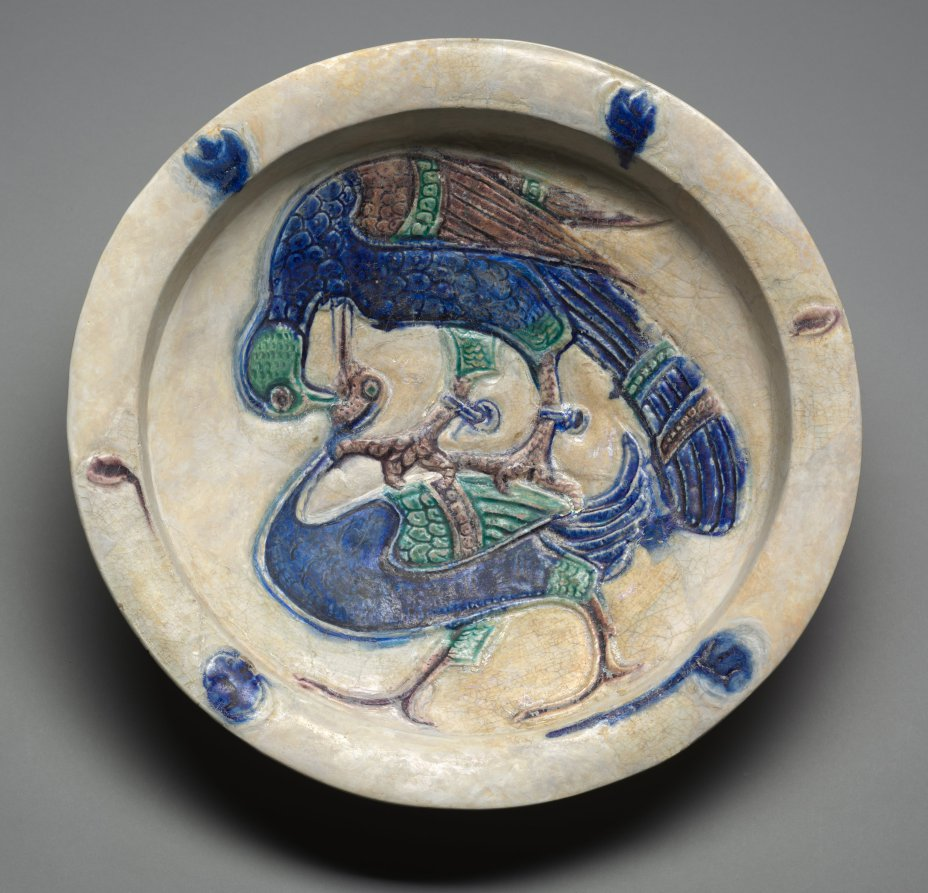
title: Dish with Falcon Attacking a Water Bird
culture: Syria, possibly Tell Minis, Zangid (1127–1251) or Ayyubid period (1171–1260)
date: 1100s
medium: Fritware with carved decoration and underglaze design, Lakabi ware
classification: Ceramic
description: The development of fritware in the Islamic world revolutionized ceramic production and was likely influenced by the import of Chinese porcelain. Fritware was largely made of quartz with small amounts of crushed glass and fine clay in order to produce a white body. The carved surface with raised outlines allowed glazes of different colors to be side by side without running together when fired.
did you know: Sanctioned by the Qur'an (5:4-6), falconry was for many centuries a favorite sport of Muslim rulers.